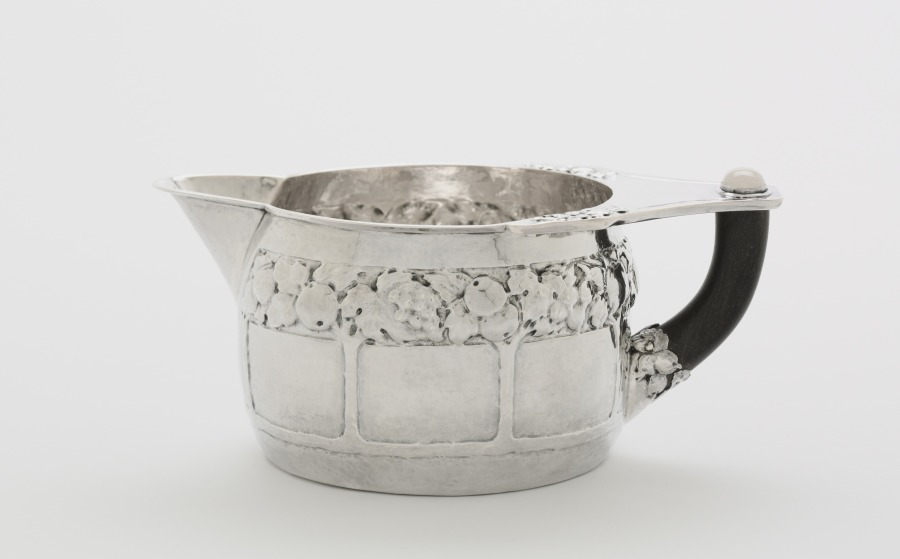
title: Creamer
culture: America, Ohio, Cleveland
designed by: Louis Rorimer (American, 1872–1939)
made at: and Rokesley Shop (American)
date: c. 1910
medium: silver, moonstones, ebony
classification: Silver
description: This tea and coffee service was designed for production by the Rokesley Shop, a collaborative group working at Louis Rorimer’s studio. Reacting against industrial mass production, Rorimer emphasized inventive design in finely crafted objects.